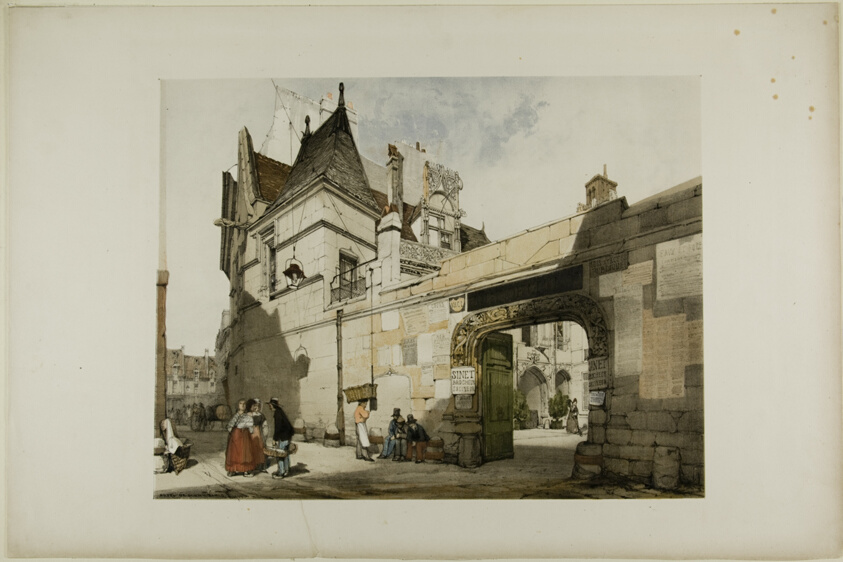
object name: Print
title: Hotel Cluny, Paris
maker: Thomas Shotter Boys (English, 1803-1874)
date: 1839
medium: Color lithograph on paper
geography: England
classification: lithograph; print; prints and drawing